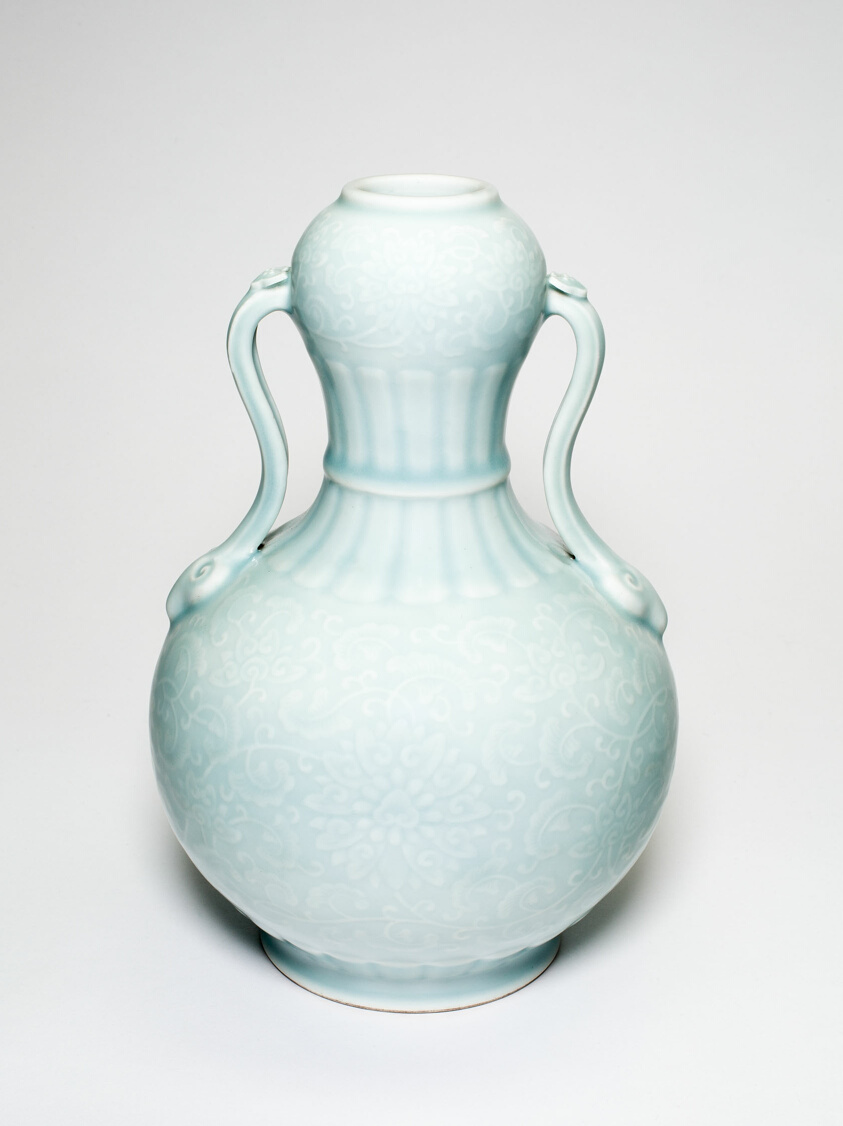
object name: Vessel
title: Celadon-glazed lotus vase (shoudaier huluping)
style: Chinese (culture or style)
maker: China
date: Qing dynasty (1644–1911), Qianlong reign mark (1736–1795), 18th/19th century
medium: Porcelain with clair-de-lune glaze and underglaze molded decoration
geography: China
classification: vase; porcelain; vessel; asian art; ceramics